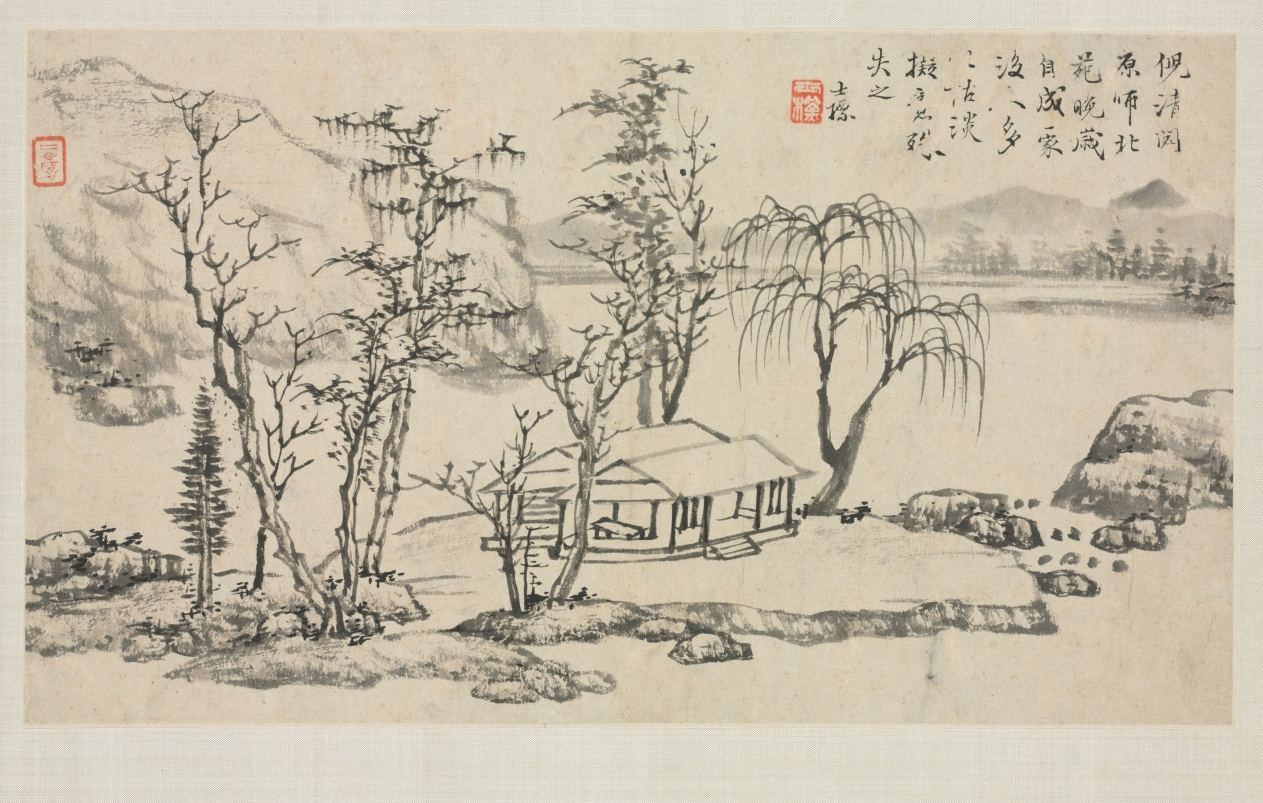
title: Landscape Album in Various Styles: Landscape after Ni Zan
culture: China, Qing dynasty (1644-1911)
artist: Zha Shibiao (Chinese, 1615–1698)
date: 1684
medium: Album leaf, ink on paper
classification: Painting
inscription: Artist's inscription, signature, and 2 seals: Ni Zan was originally a follower of Dong Yuan. In later years, he formed a style of his own. The followers of Ni Zan, however, try to imitate his dryness and lightness. This is to miss [Ni Zan]. Shibiao [seal] Shibiao. [seal, upper left edge] Erzhan.